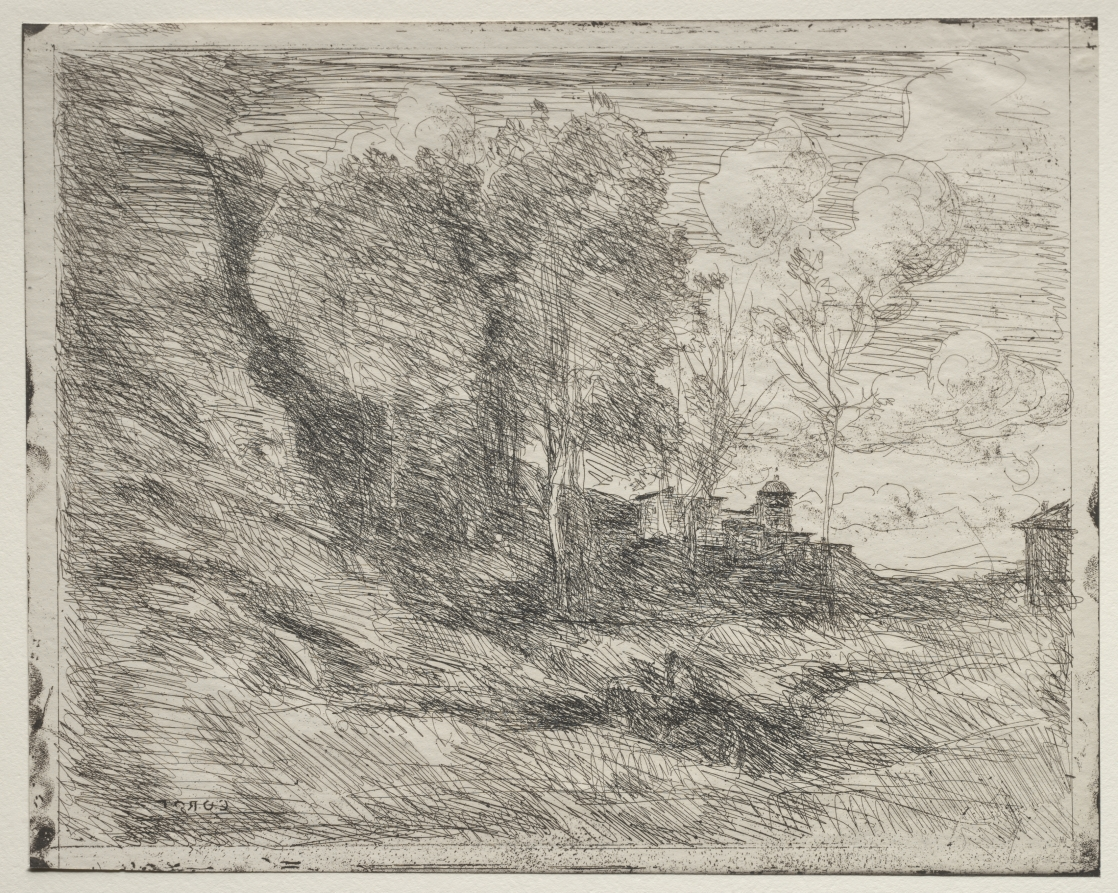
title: A Souvenir of Ostia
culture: France, 19th century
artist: Jean Baptiste Camille Corot (French, 1796–1875)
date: original impression 1855, printed in 1921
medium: cliché-verre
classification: Print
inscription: signed, lower left: "COROT" in the glass plate